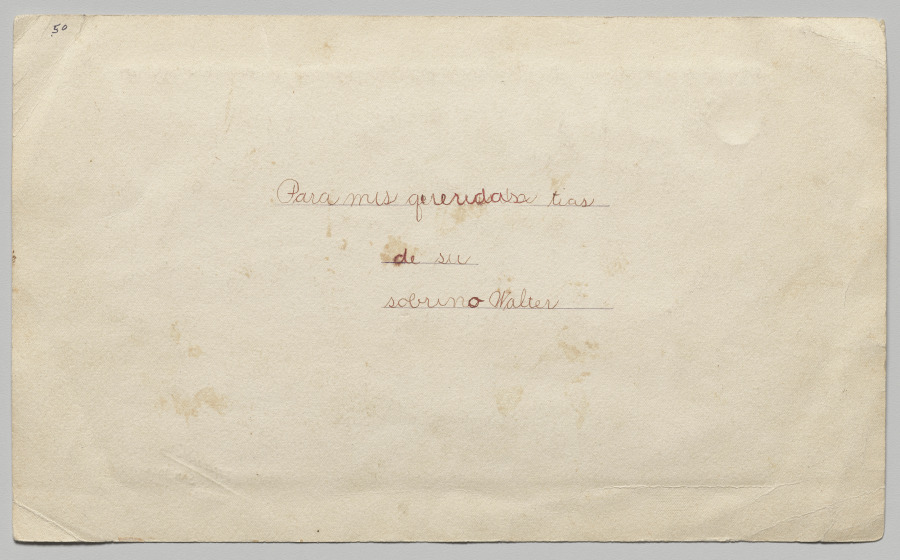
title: Untitled (Semi-Circle of Children, Central Girl Dressed as an Angel Holding the Baby Jesus)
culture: Costa Rica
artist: Andrés and Francisco Hernández (Costa Rican, active c. 1910s–30s)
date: c. 1910s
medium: gelatin silver print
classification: Photograph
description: The Foto Imperio photography studio was run by Andrés and Francisco Hernández in San José, Costa Rica. The brothers also ran a bookstore and print shop, and Francisco was a successful cartoonist, too. Here they artfully arranged 35 children to create a group portrait commemorating a religious event—perhaps a Christmas pageant? The girl dressed as an angel holds a baby, while the girl and boy at her feet seem posed as if for a wedding portrait.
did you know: Portraits are the bread-and-butter business of most photography studios.